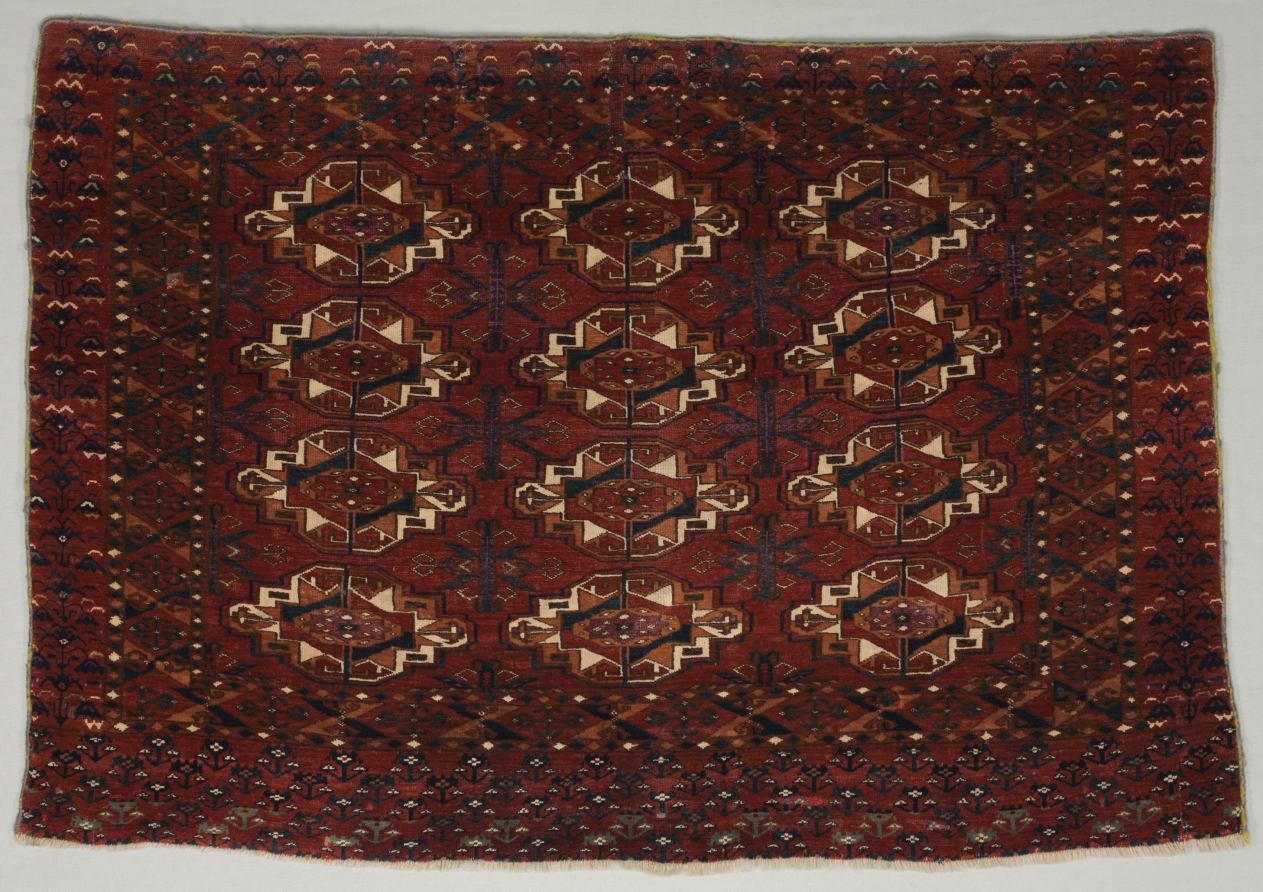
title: Turkmen Bag Face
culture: Turkmenistan, Saryk tribe of the Turkmen people (1850-1899), 19th century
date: 1800s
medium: Wool, silk, cotton; 252 symmetrical rug knots per square inch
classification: Textile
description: The front of this bag, called a bag face, displays the distinctive hallmarks of the Saryk tribe. The main guls, or lobed motifs, are subdivided in quadrants and alternate with angular minor guls in staggered rows. It is the oldest known weaving of the Saryk tribe, with a soft red ground color and white cotton and magenta silk pile highlights. Essential storage containers, bags were suspended from wall trellises inside tents and transported by pack animals during seasonal migrations. Bags were woven in one piece with pile on the upper part for the front face and plain weave on the lower part for the back face, and then folded and sewn along both sides.